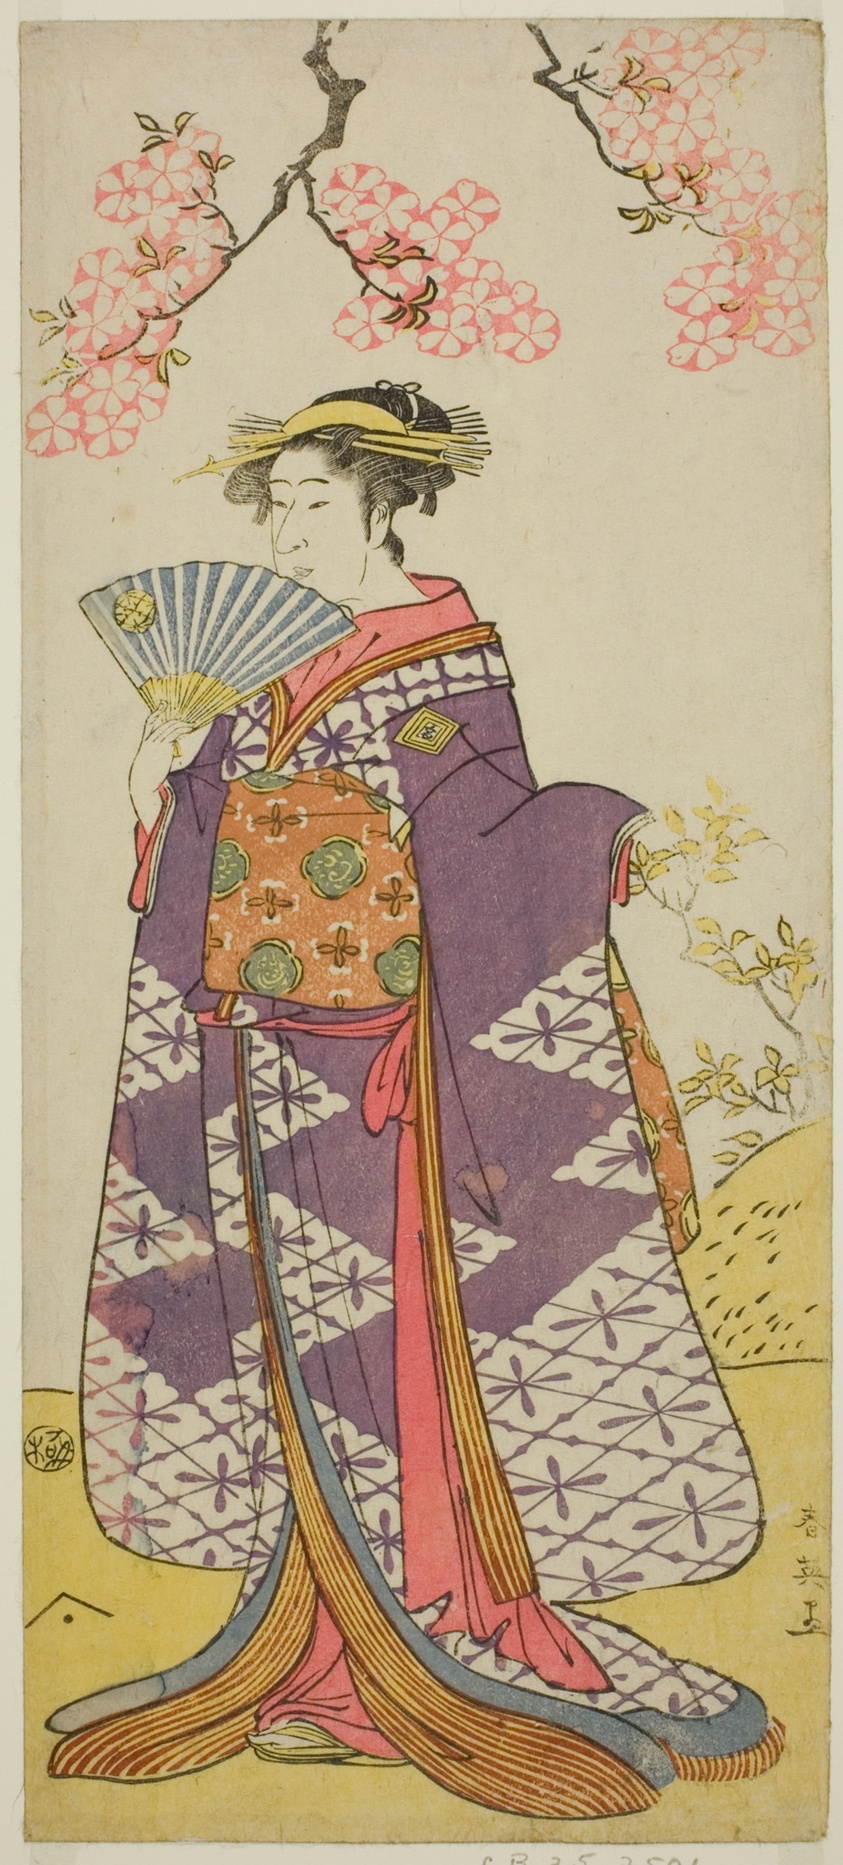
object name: Print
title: The Actor Ichikawa Komazo II as the Spirit of Lady Shiragiku in the Play Hatsu Midori Saiwai Soga, Performed at the Kawarazaki Theater in the Third Month, 1791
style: Japanese (culture or style)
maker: Katsukawa Shun'ei (Japanese, 1762-1819)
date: c. 1791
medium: Color woodblock print; hosoban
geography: Japan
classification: woodblock print; print; asian art